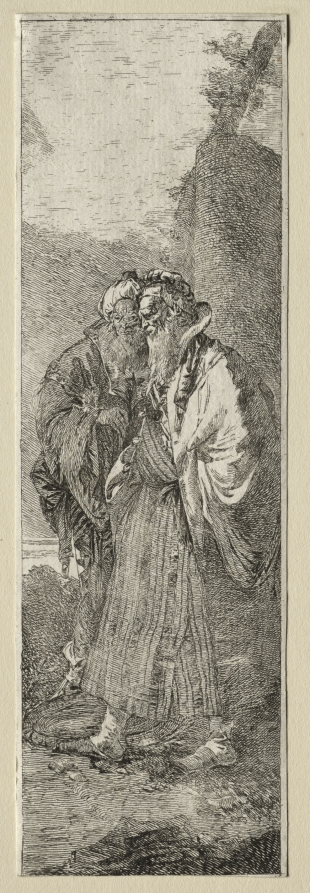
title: Two Old Men in a Landscape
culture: Italy, 18th century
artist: Giovanni Domenico Tiepolo (Italian, 1727–1804)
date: late 1700s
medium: etching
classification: Print